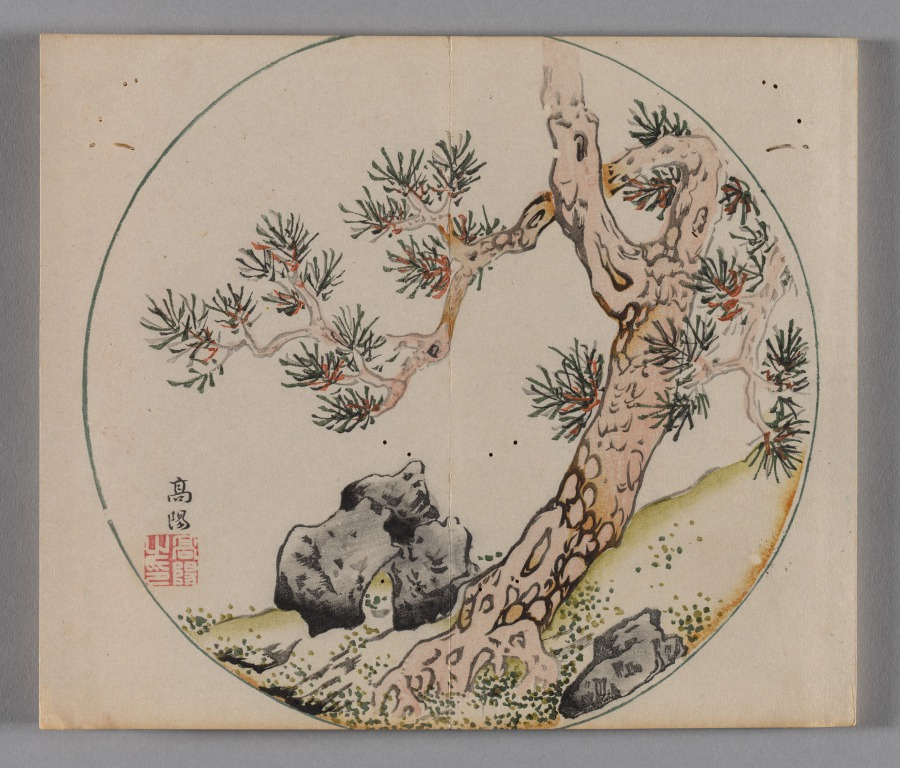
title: Ten Bamboo Studio Painting and Calligraphy Handbook (Shizhuzhai shuhua pu): Round Fans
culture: China, Qing dynasty (1644-1911)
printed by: Hu Zhengyan (Chinese, c. 1584–1674)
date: 1633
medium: Woodblock-printed book; ink and colors on paper; first edition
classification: Print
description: Color printing reached a level of perfection in the early 1600s, as seen in this Ten Bamboo Studio Collection of Calligraphy and Painting and the Mustard Seed Garden Manual of Painting (printed 1679 and 1701). The painterly quality, precision in registering (aligning) the woodblocks, and harmonious colors made them the most successful color print editions in Chinese history. Both editions were printed and compiled in Nanjing, spread nationwide, and had a great impact on the arts in Japan and Korea.